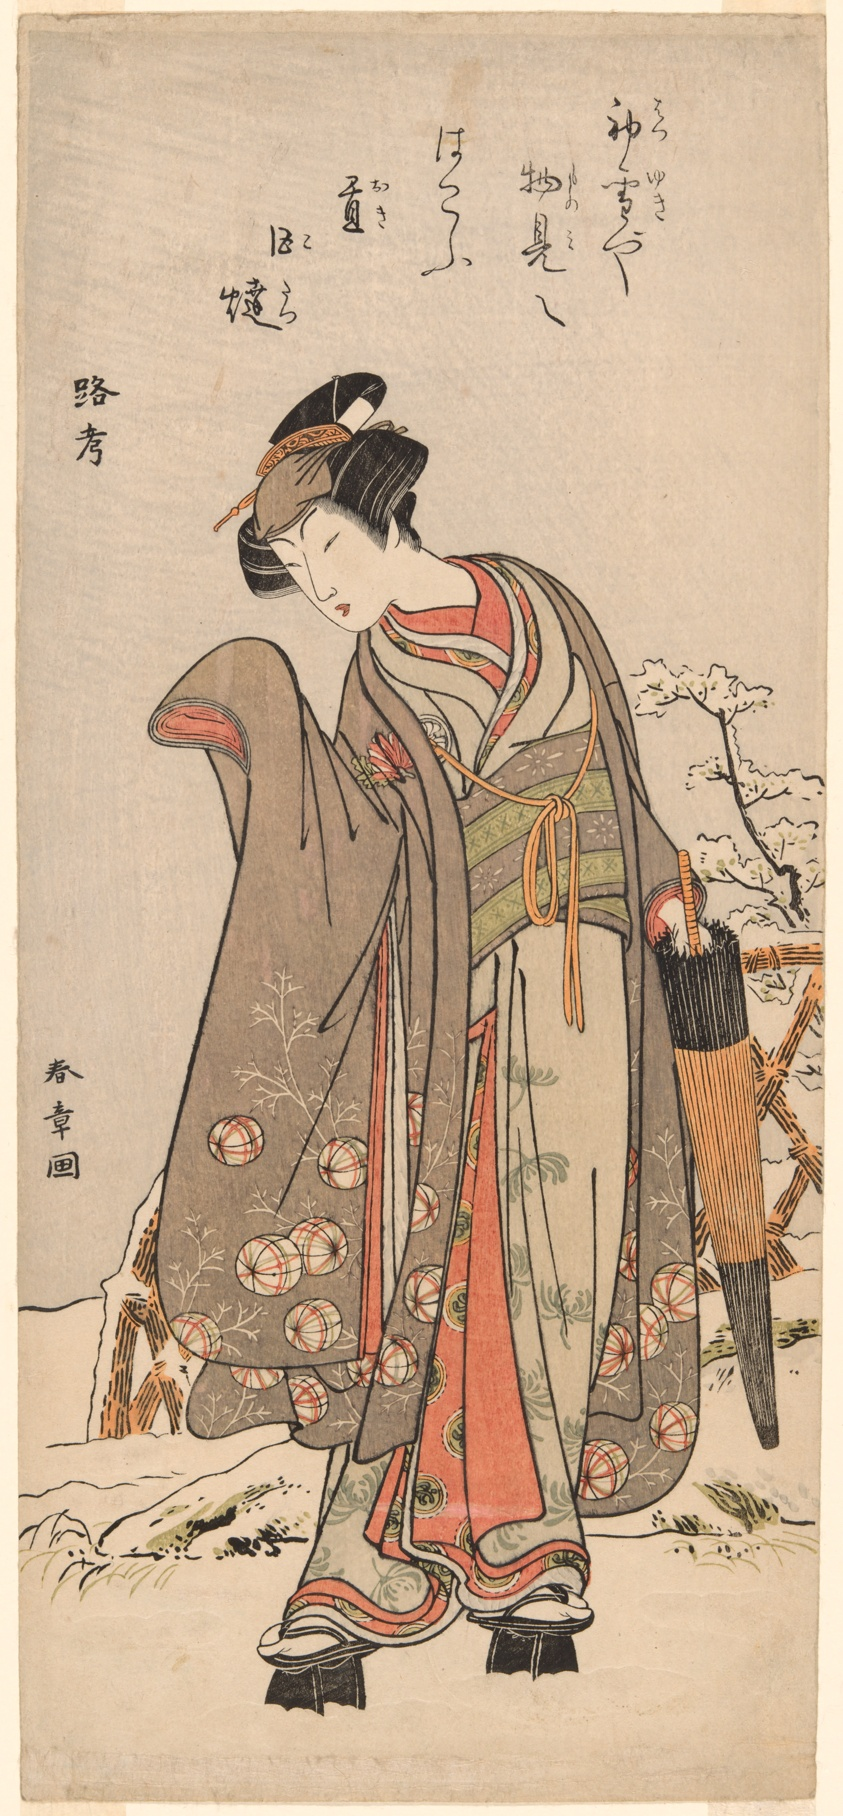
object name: Print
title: The Actor Segawa Kikunojo III in Private Life, Standing in a Snow-Covered Garden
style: Japanese (culture or style)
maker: Katsukawa Shunsho 勝川 春章; Japanese, 1726-1792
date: c. 1775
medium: Color woodblock print; large hosoban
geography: Japan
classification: woodblock print; print; asian art